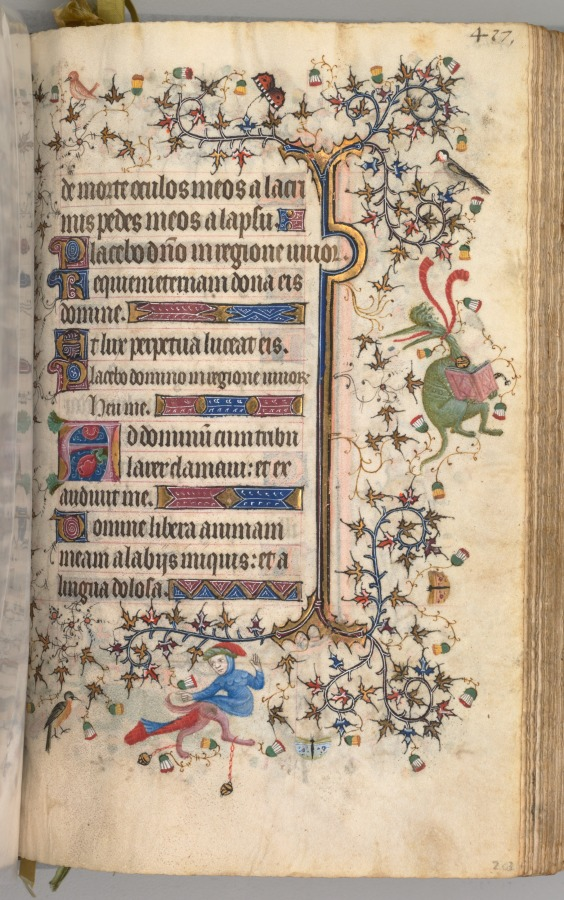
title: Hours of Charles the Noble, King of Navarre (1361-1425): fol. 203r, Text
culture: France, Paris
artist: Master of the Brussels Initials and Associates (French)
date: c. 1405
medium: ink, tempera, and gold on vellum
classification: Bound Volume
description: This precious volume was obviously highly prized by its owner, the French-born King of Navarre, who had his coat of arms painted on no less than twenty folios. Rather than directly commissioning this manuscript from a specific workshop, it seems that Charles the Noble acquired his book of hours -- perhaps ready-made for the luxury market -- while on a trip to Paris in 1404-05. A collaborative effort, six painting styles are evidenced within the pages of this codex, those of two Italians, two Frenchmen, and two Netherlanders. The painter who was responsible for the planning and decoration of the book, and who produced seventeen of the large miniatures, was a Bolognese artist known as the Master of the Brussels Initials. His principal assistant, responsible for most of the borders, was a Florentine who signed his name "Zecho" da Firenze on folio 208 verso.